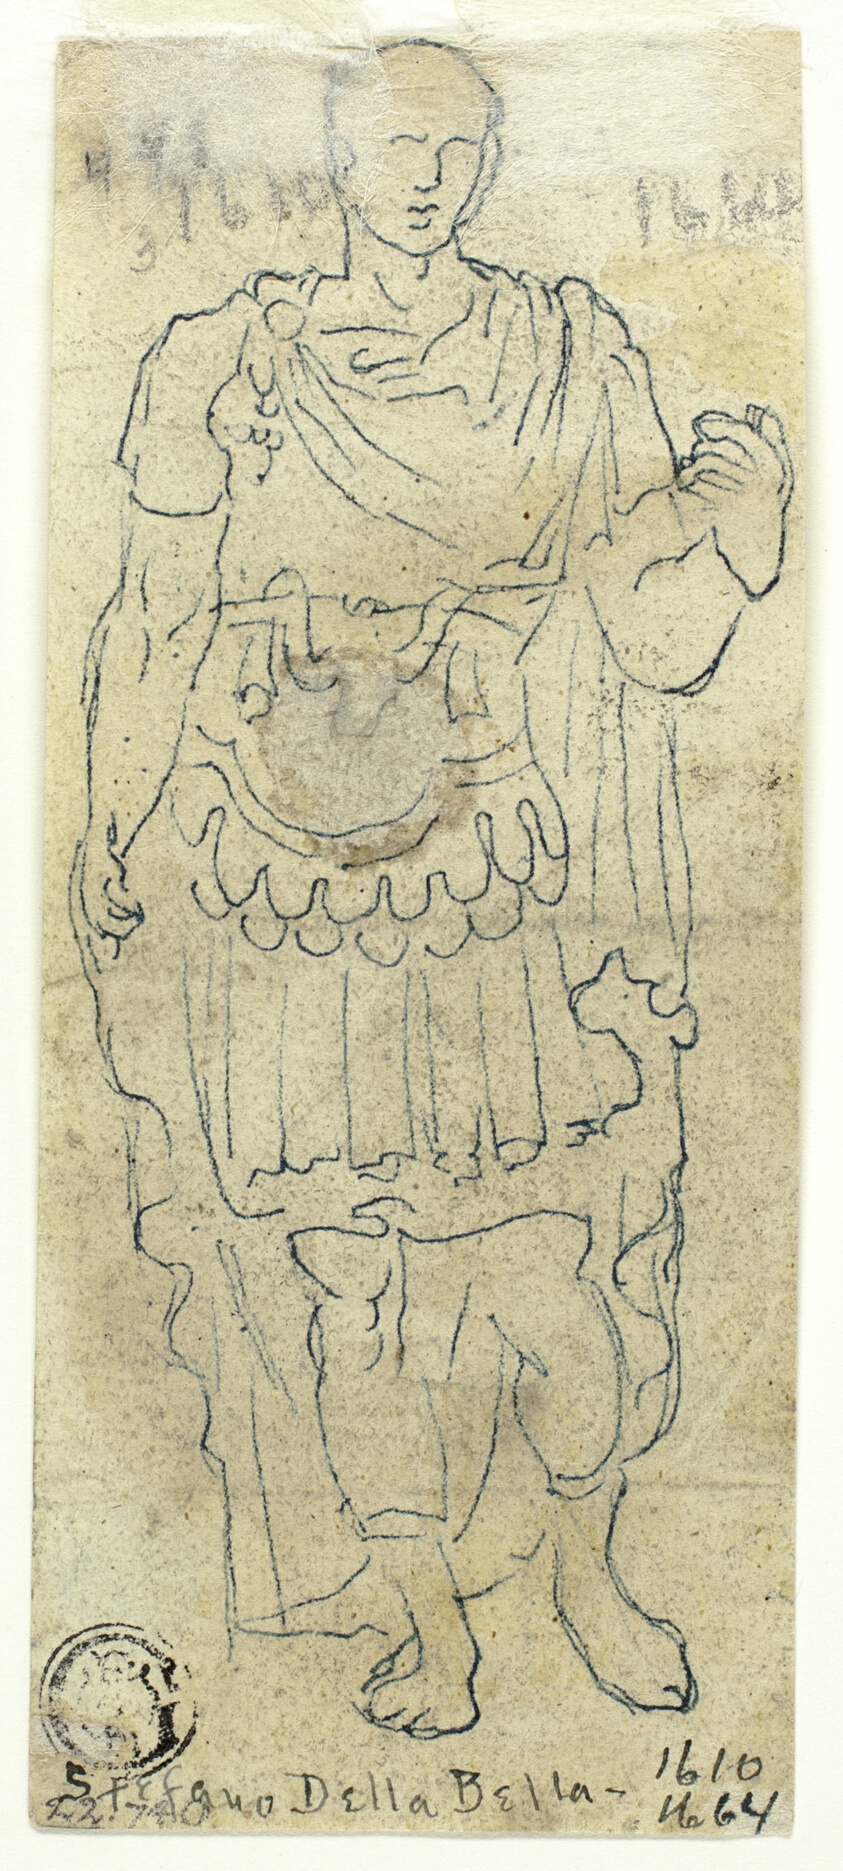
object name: Drawing and Watercolor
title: Statue of Augustus Caesar (recto and verso)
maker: Unknown Italian; Late 16th century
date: n.d. (recto); Late 16th c. (verso)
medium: Pen and brown ink over traces of black chalk (recto) and pen and blue ink (verso), on ivory laid paper, with incising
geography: Italy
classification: pen and ink drawings; drawings (visual works); prints and drawing